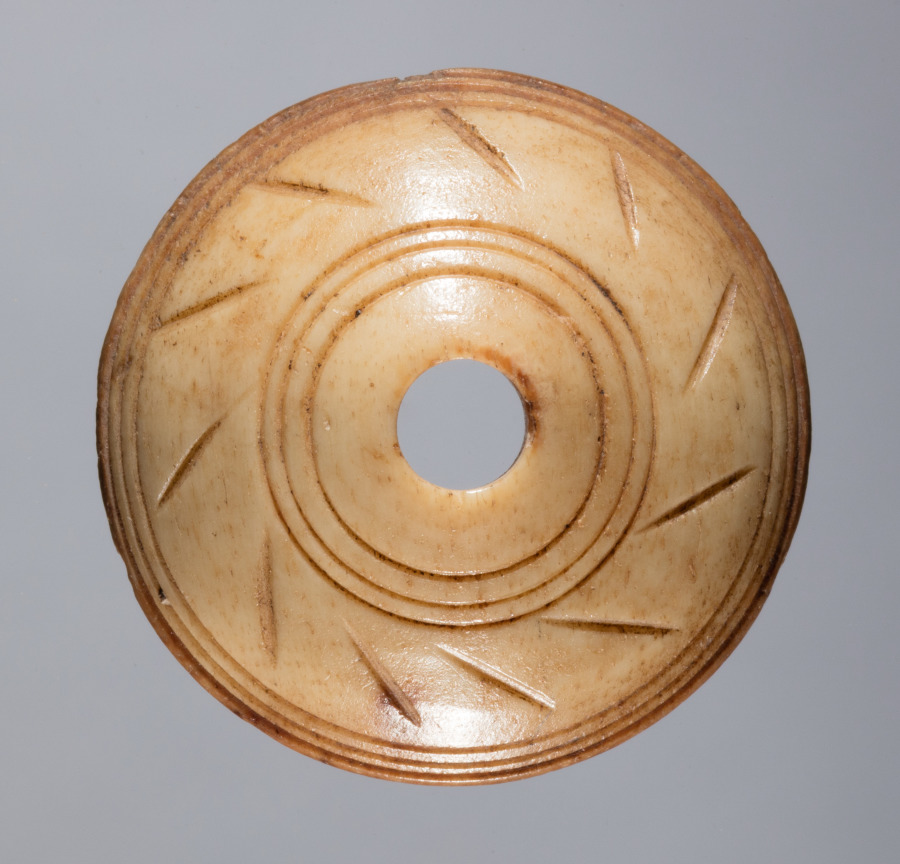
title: Spindle Whorl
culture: Iran, early Islamic period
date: 700s - 900s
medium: bone, incised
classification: Spindle Whorl